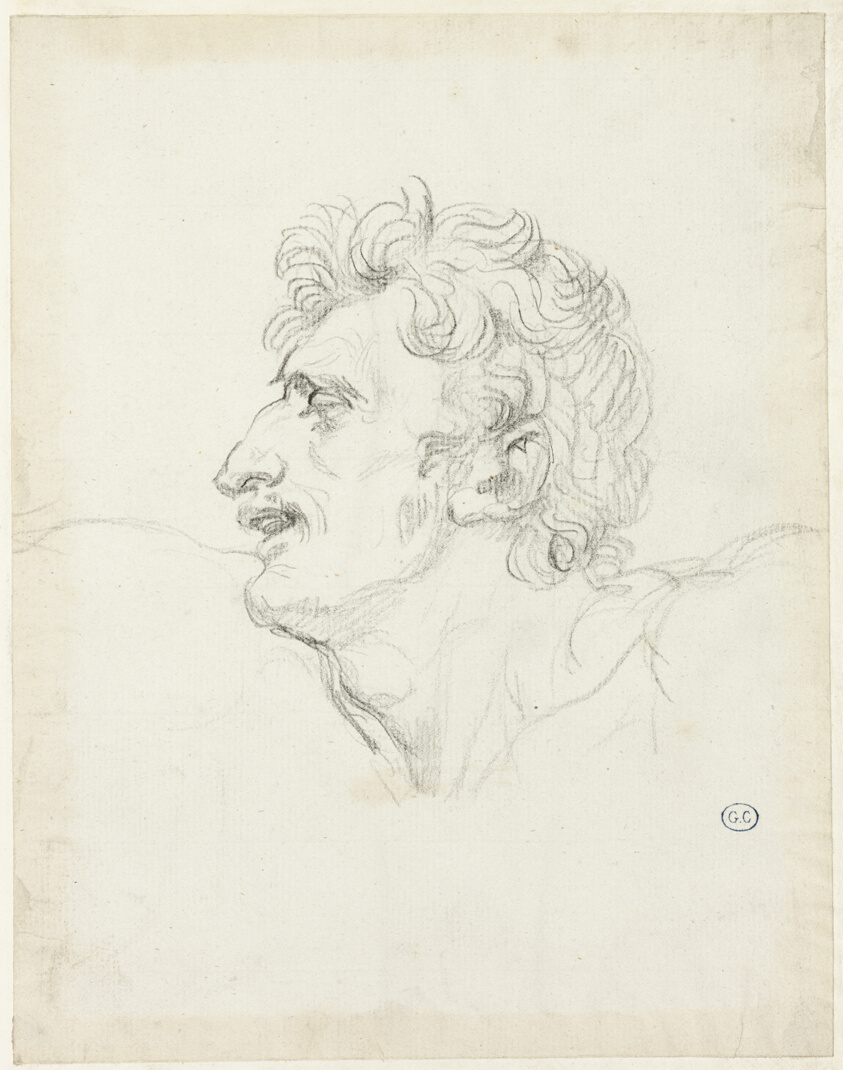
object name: Drawing and Watercolor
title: Head of a Man, Left Profile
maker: Jacques-Louis David; French, 1748-1825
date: c. 1810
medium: Graphite, with traces of black chalk, on off-white laid paper, edge mounted on cream wove paper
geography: France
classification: graphite; drawings (visual works); prints and drawing